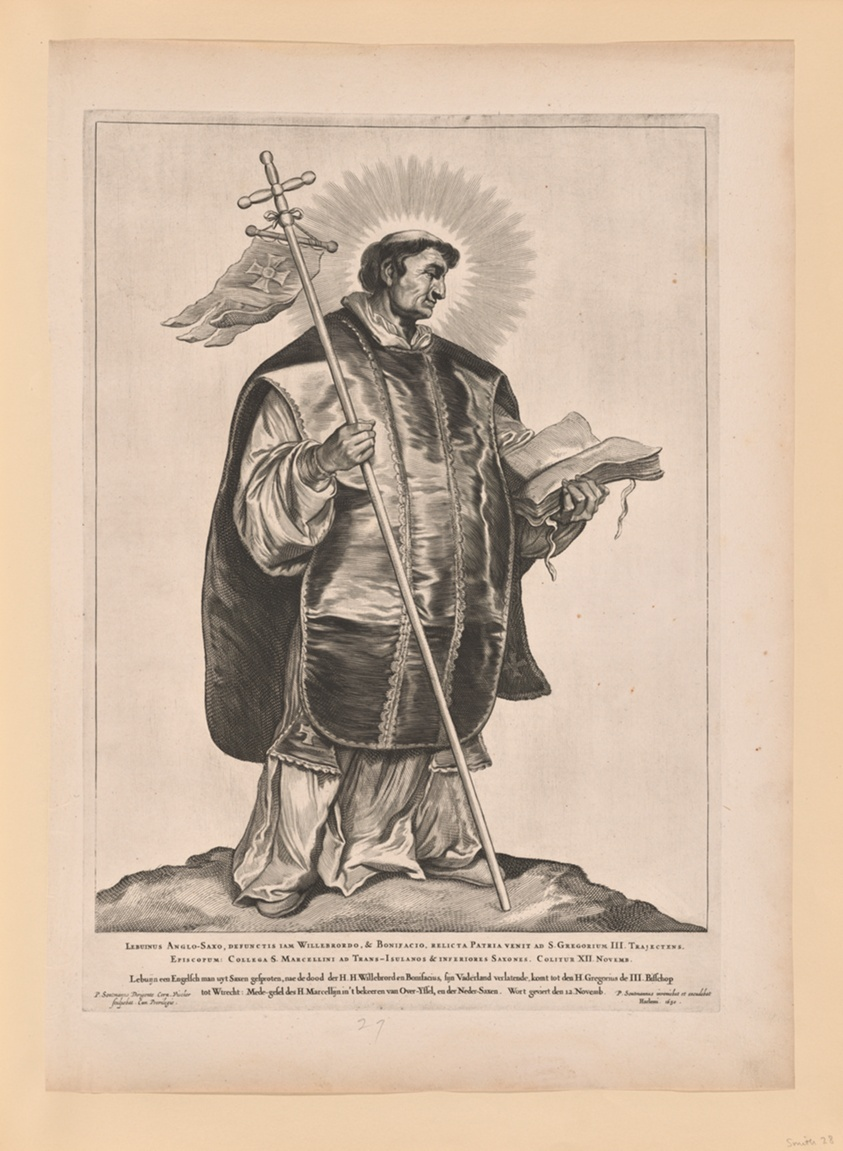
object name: Print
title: Saint Marcellinus, from Saints of the North and South Netherlands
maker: Cornelis Visscher (Dutch, c. 1629-1658); after Pieter Claesz. Soutman (Dutch, c. 1580–1657)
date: 1650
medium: Etching and engraving on paper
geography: Netherlands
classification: engraving; paper; print; prints and drawing